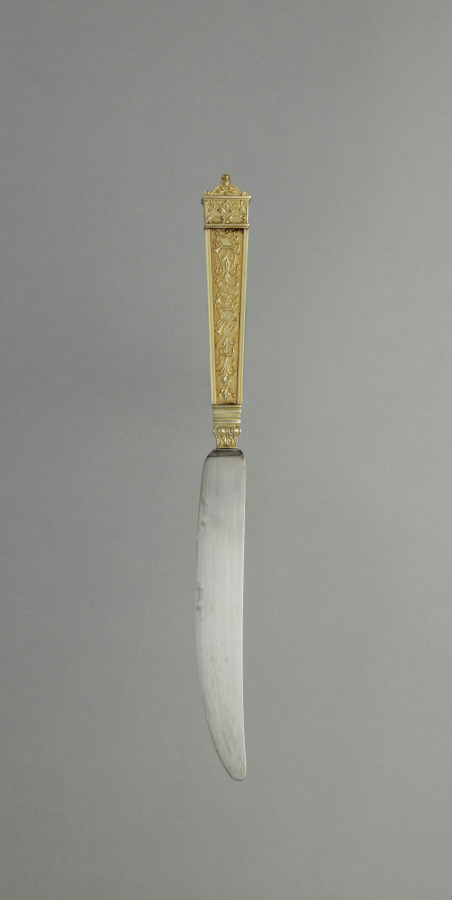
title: Dessert Knife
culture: France, 19th century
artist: Maison Cardeilhac (French)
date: c. 1880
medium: gilt silver and ivory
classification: Silver